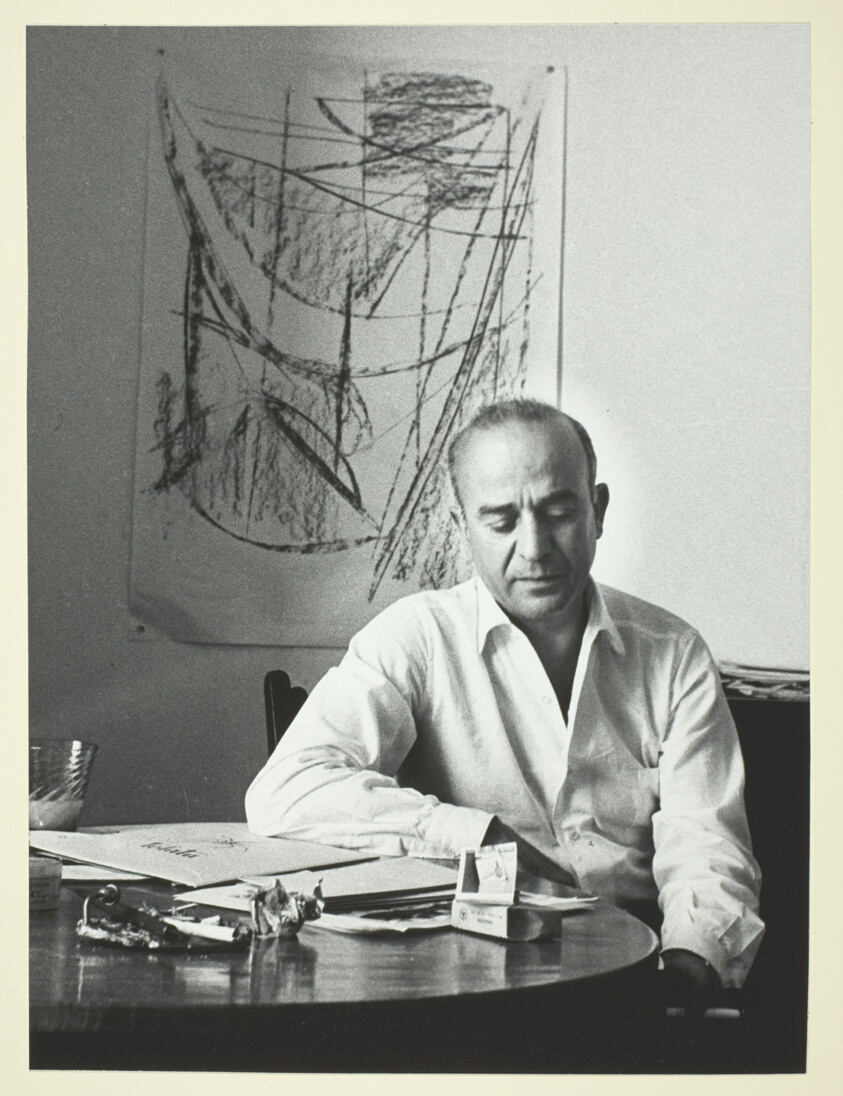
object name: Photograph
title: Corpera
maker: Sanford H. Roth (American, 1906–1962)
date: 1947/55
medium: Gelatin silver print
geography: United States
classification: gelatin silver (developing-out-paper) pr; photographic process; photography; photograph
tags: portraits